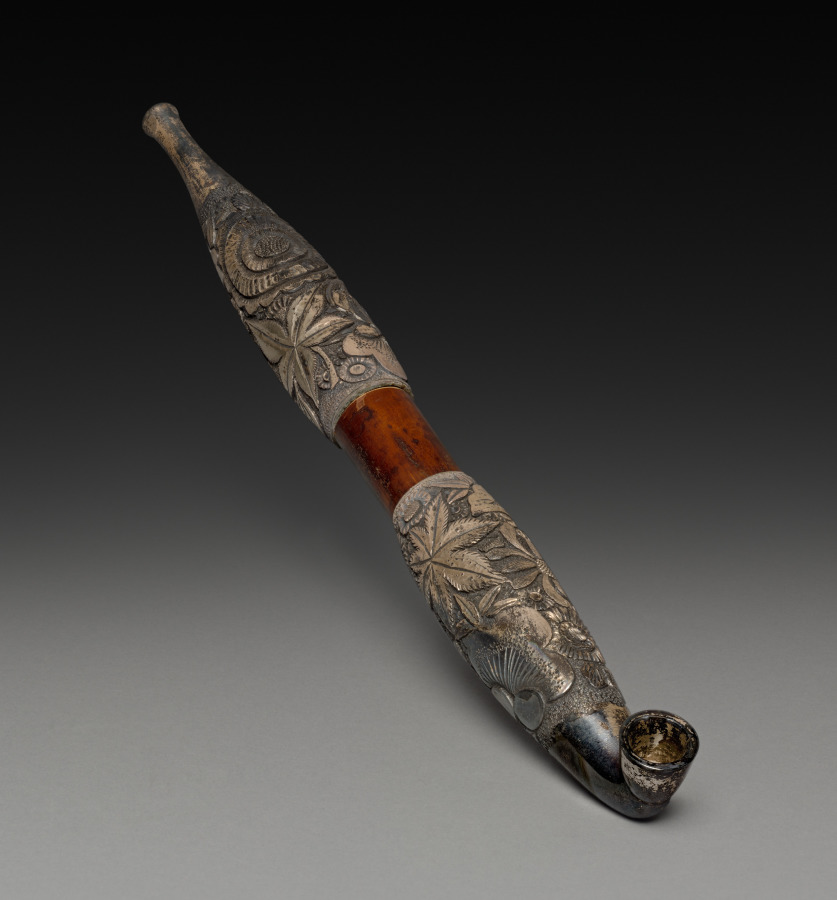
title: Tobacco Pipe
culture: Japan, Edo period (1615–1868)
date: early to mid-1800s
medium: bamboo and silver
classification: Miscellaneous